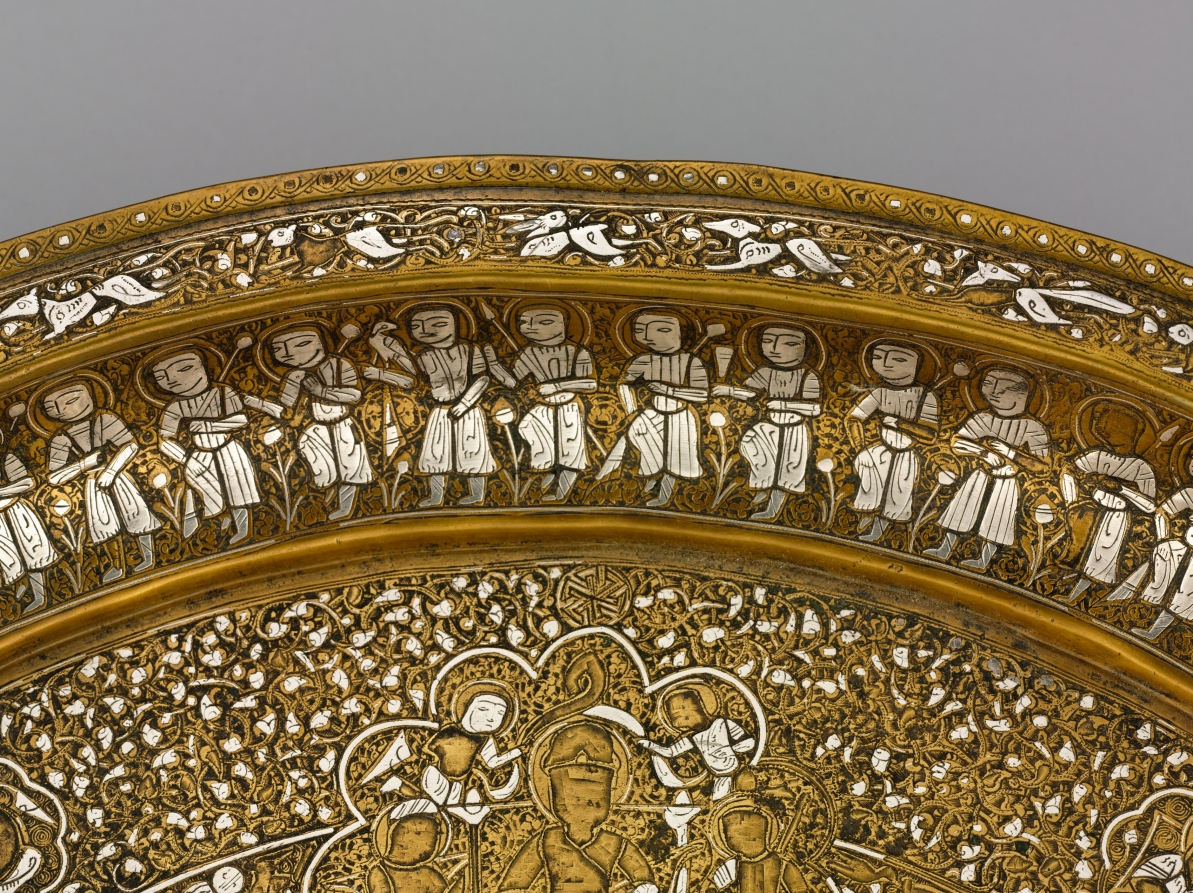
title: Tray Portraying Courtly Pleasures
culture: Syria, Ayyubid period (1171–1260)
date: 1240s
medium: sheet brass inlaid with silver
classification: Metalwork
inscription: The presence of ligatures in the narrow circular bands with interconnected human and animal figures suggests this may be a degenerate form of animated script. It is indecipherable.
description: This tray features images of courtly life interspersed with astronomical symbols. The scenes contained within large multilobed medallions display an enthroned prince with lions at his feet, a banquet, a hunt, dancers, and musicians. Contained within the concentric circles there are also references to solar and lunar motifs, including figures holding sunbursts and lunar crescents. This tray is made of a single sheet of brass and the silver inlay, which is best preserved on the tray’s inner curve, suggests its original brilliance.